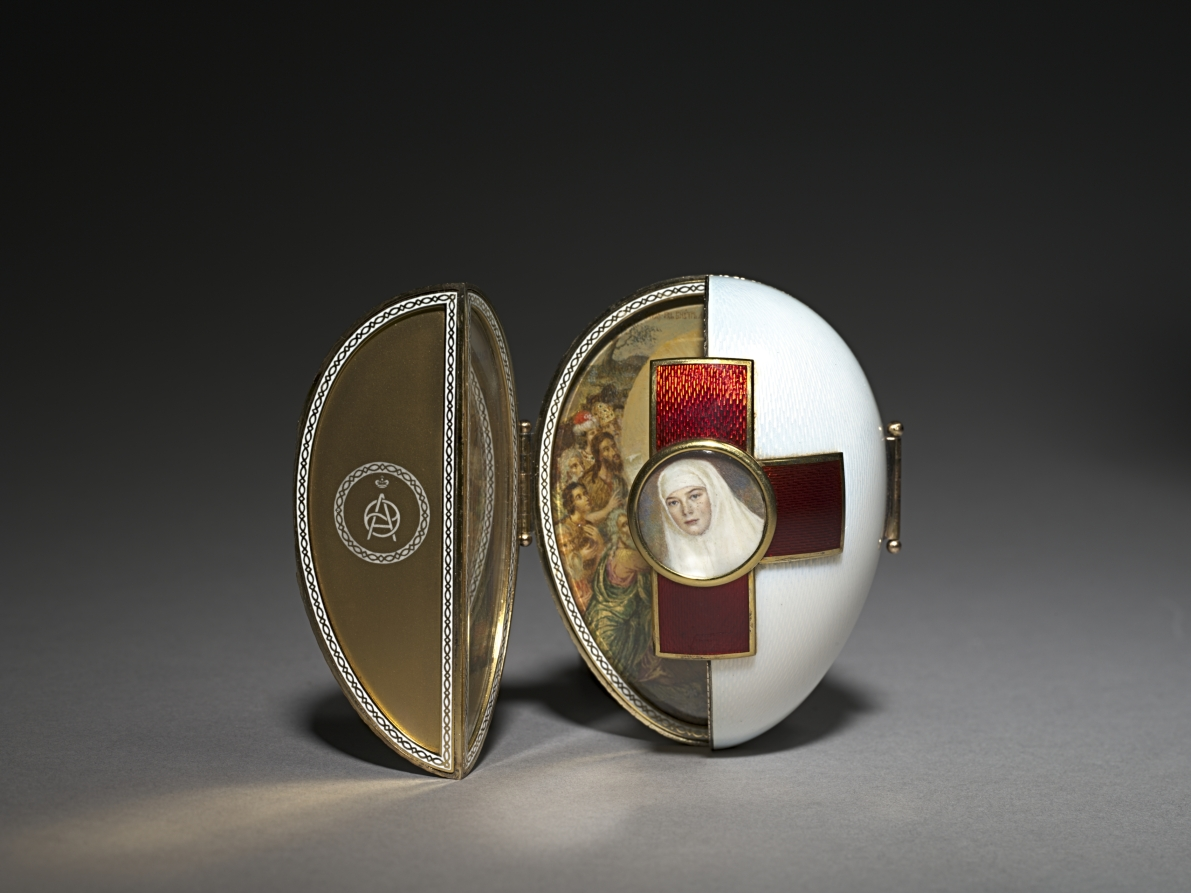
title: Imperial Red Cross Easter Egg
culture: Russia, St. Petersburg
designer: Peter Carl Fabergé (Russian, 1846–1920)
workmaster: Henrik Wigström (Russian, 1862–1923)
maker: House of Fabergé (Russian, 1842–1918)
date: 1915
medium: gold, silver gilt, enamel, glass, ivory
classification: Miscellaneous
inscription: inscribed on interior of egg: symbols for Alpha and Omega and imperial crown for Alexandra Feodorovna; 1915; inscriptions in Cyrillic, Old Church Slavonic, and Roman letters which identify Sts. Olga and Tatiana and presumably describe the central scene of the triptych.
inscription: Inscribed on silk velvet and satin lined case: double-headed eagle, Fabergé, Petersburg, Moscow, London (all in Cyrillic on lining of case); 17.559, abbreviation for "Red Cross" (in Cyrillic in red ink on outside of case).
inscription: Hallmarks: 72, Kokoshnik, lower case alpha in script [assay mark of St. Petersburg, 1908-26]; H.W. [initials of workmaster Henrik Wigström]; Fabergé (in Cyrillic).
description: The House of Fabergé made two imperial Easter eggs in 1915 that honored the contributions of Tsarina Alexandra and her two eldest daughters, Olga and Tatiana, to the war effort as Red Cross Sisters of Mercy. Compared to other Fabergé eggs elaborately ornamented with jewels, the eggs reflected the mood of austerity in Russia during World War I. This version becomes an icon when opened, revealing miniatures of the patron saints of the tsarina’s daughters. After the Russian Revolution, this relic of the Tsarist past was sold by the Soviet government to raise needed cash for the treasury.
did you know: This egg was confiscated by the Bolsheviks during the Russian Revolution and sold by the government of Josef Stalin in the 1930s to raise money for the Soviet treasury.